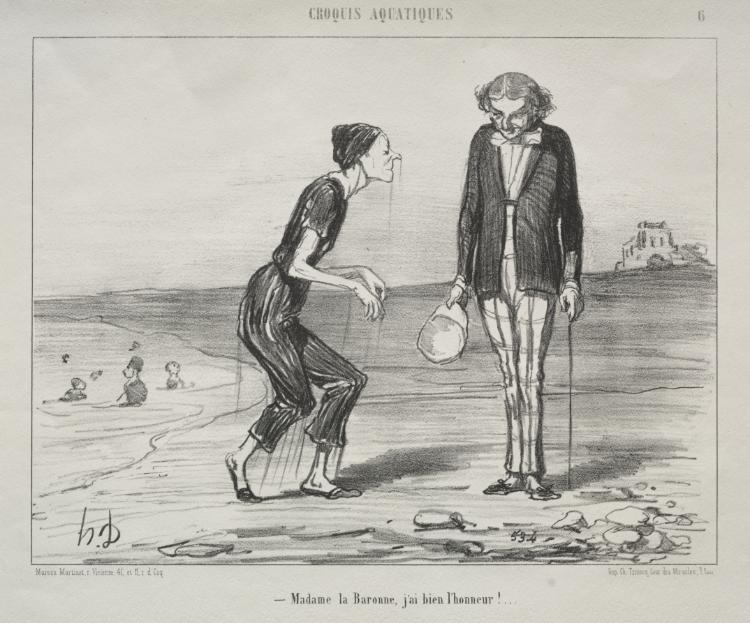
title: Baroness, it is my honor!...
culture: France, 19th century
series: Aquatic Sketches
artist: Honoré Daumier (French, 1808–1879)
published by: Ch. Trinocq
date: 1853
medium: lithograph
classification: Print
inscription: Above image, printed: CROQUIS AQUATIQUES / 6 ; Below image, printed: - Madame la Baronne, j'ai bien l'honneur!...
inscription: Lower margin, printed: Maison Martinet, r. Vivienne, 41 et 11, r. d. Coq. / Imp. Ch. Trinocq, Cour des Miracles, 9, Paris ; upper margin, in pencil: H&D 1227 ; lower margin, in pencil: 15 Août 1853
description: This print was published in Le Charivari (August 15, 1853) as plate 6 from the series Aquatic Sketches.